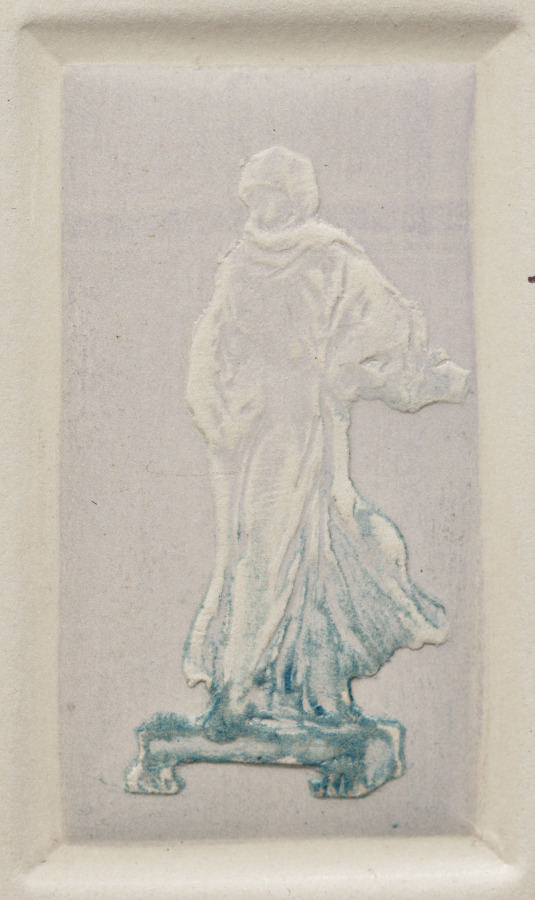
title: Decorative Motif/ Small Standing Figure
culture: France, early 20th Century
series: La Loïe Fuller, by Roger Marx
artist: Pierre Roche (French, 1855–1922)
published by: Les Cents Bibliophiles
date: 1904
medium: gypsograph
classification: Bound Volume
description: Although best known as a sculptor, Roche was a versatile and prolific artist who worked in many mediums. Loïe Fuller, the pioneer of modern dance who took Paris by storm in 1892, was one of his favorite subjects. He portrayed her in clay, bronze, marble, plaster, and in a series of gypsographs that illustrated an essay by the art critic Roger Marx. The book was described as "a precious monument to Loïe Fuller."